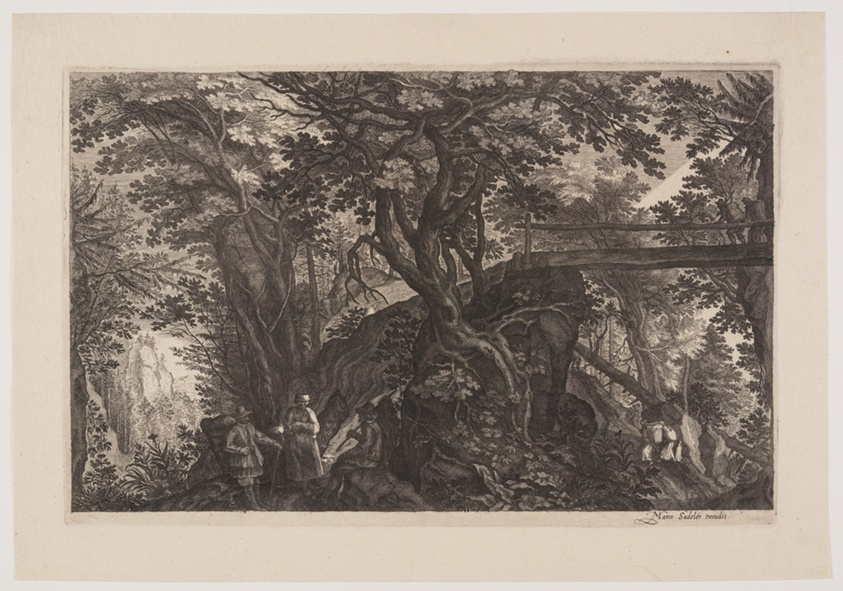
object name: Print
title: A Forest with a Wooden Bridge on the Right, from Eight Scenes from Bohemia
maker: Aegidius Sadeler II (Flemish, c. 1570–1629); after Pieter Stevens (Flemish, 1567-after 1624)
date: c. 1610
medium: Engraving on ivory laid paper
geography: Flanders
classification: print; paper; prints and drawing; engraving